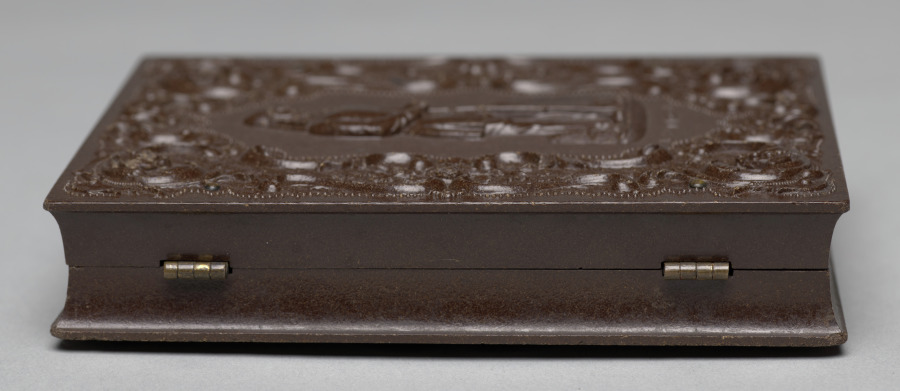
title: The Homework Table & Parents of Five Children Doing Homework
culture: America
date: c. 1858–60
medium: daguerreotype, quarter plate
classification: Photograph